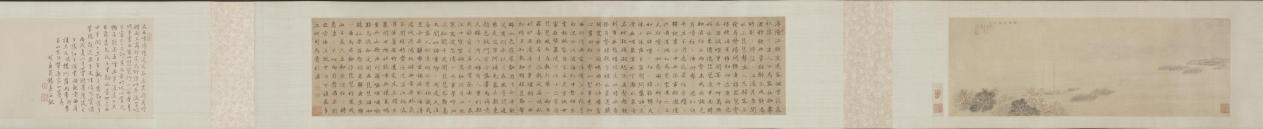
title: Saying Farewell at Xunyang (Song of the Pipa)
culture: China, Ming dynasty (1368–1644)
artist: Wen Boren (Chinese, 1502–1575)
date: 1500s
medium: handscroll, ink and color on paper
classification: Painting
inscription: "潯陽送客圖" 五峰山人文伯仁寫于停雲館中 [印] 文伯仁; 五峰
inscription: 2 colophons and 9 additional seals: 1 transcription of "Pipa xing 琵琶行” (Song of Pipa) and 3 seals of Zhu Yizun 朱彜尊 (1629-1709); 2 seals of Wu Rongguang 吳榮光 (1773-1843); 1 colophon, dated 1826, and 3 seals of Wu Xijia 吳錫嘉 (mid-1700s)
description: This handscroll depicts The Song of the Pipa, a poem by Bai Juyi 白居易 (772–846) written after the poet’s encounter with a pipa player on the Yangzi River. Expelled from her home city when her beauty and fame had faded, she played for the poet at night. Her musical performance and tragic life story resonated with Bai Juyi, who had just been demoted and exiled from life at court himself. The hazy, vast view and pale color tonalities of this painting illustrate these feelings of endless sadness, having lost one’s sense of purpose in life.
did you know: Wen Boren depicted the chilly autumn water with a fishnet pattern.